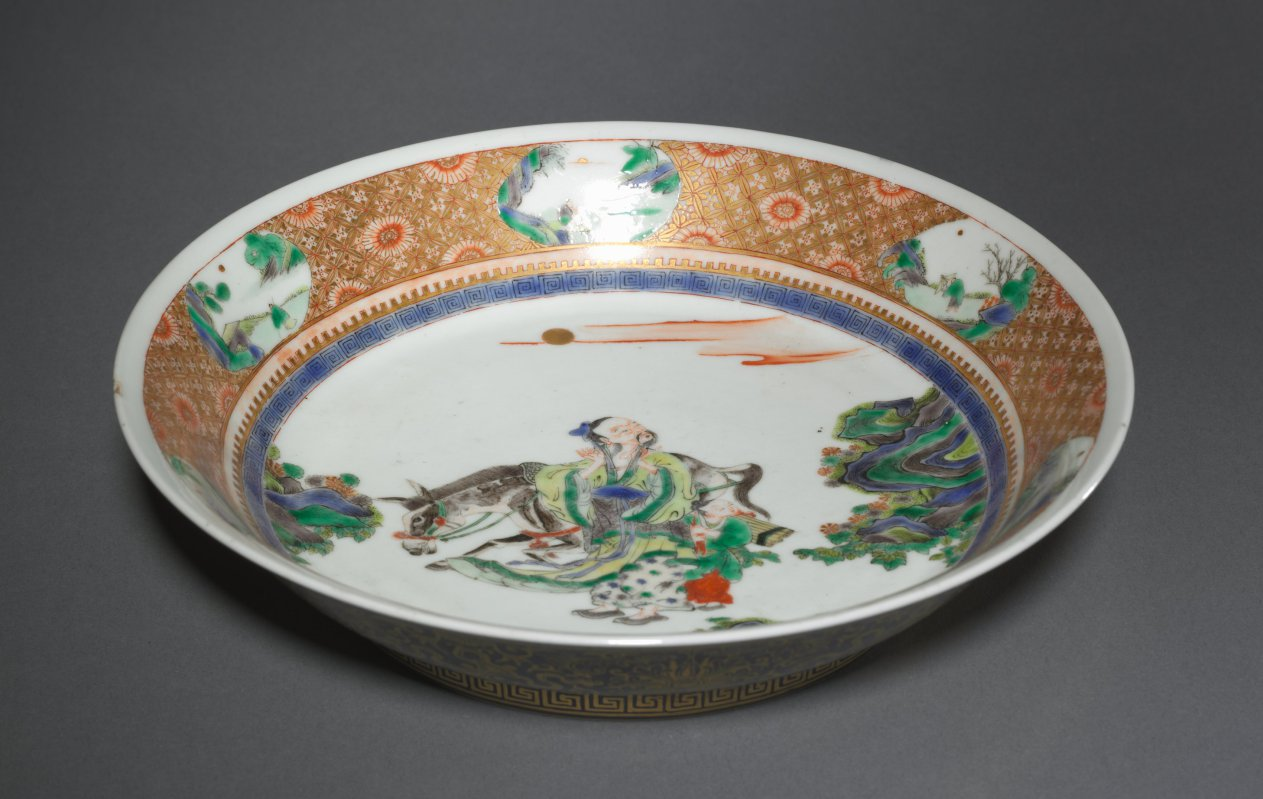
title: Dish with Zhang Guolao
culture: China, Jiangxi province, Jingdezhen kilns, Qing dynasty (1644-1911), Kangxi reign (1662-1722)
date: 1662–1722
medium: porcelain with famille verte overglaze enamel and painted gold decoration (interior) and powder blue glaze with painted decoration (exterior)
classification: Ceramic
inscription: 大清康熙年製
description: Zhang Guolao, featured on this dish, is one of the Eight Immortals and a gifted magician who was believed to know the secret arts to obtain longevity. Typically depicted as an old man and accompanied by his mule, he is the patron saint of artists. His mule is said to be magical; it can be folded up like a piece of paper to fit into a small bag. The central scene is framed by a sumptuously gold-decorated rim showing spaces reserved for landscape scenes in primarily fresh blue and green colors.